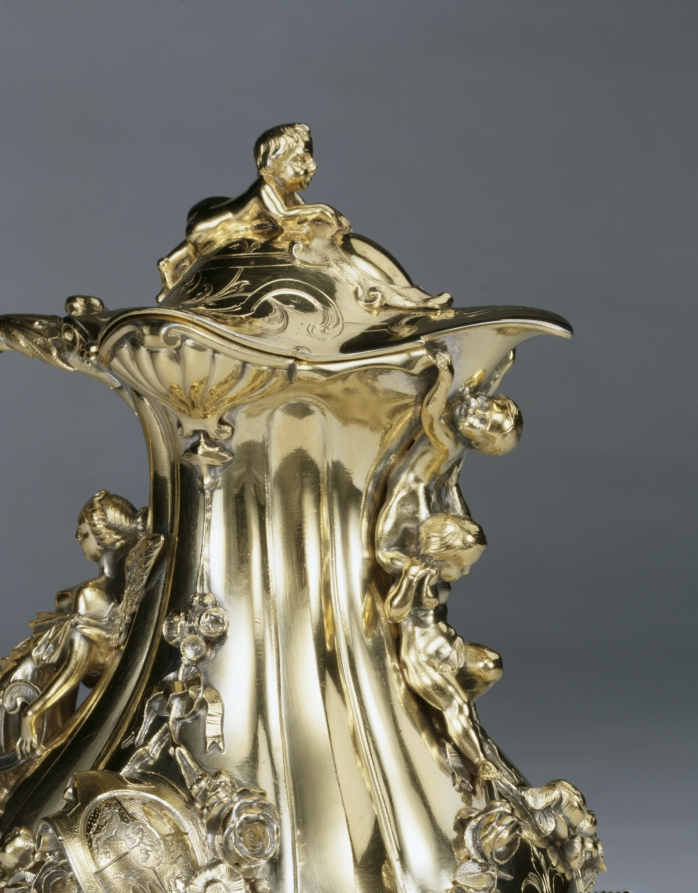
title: Covered Jug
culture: France, 19th century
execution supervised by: Jean-Valentin Morel (French, 1794–1860)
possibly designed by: Jules Dieterle (French, 1811–1889)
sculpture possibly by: Jules Klagmann (French, 1810–1867)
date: c. 1845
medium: gilded silver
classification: Silver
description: The elegance and richness of this ewer demonstrate the high level of technical mastery achieved by its maker. Morel studied under his father, a Parisian lapidary (someone who cuts, polishes, and engraves hard stones), and with Adrien Vachette, a maker of gold boxes. In 1842 he went into partnership with Charles-Edmond Duponchel, which lasted until the late 1840s, at which time he established himself in London, remaining there until 1852, when he returned to Paris. Morel frequentlyfollowed the designs of others, and it has been suggested that in the case of this pitcher his well-known contemporary, Jules Dieterle (1811-1889), may have conceived the overall form. The female figure seems to have been based on a design by the sculptor Jules Klagmann (1810-1867).